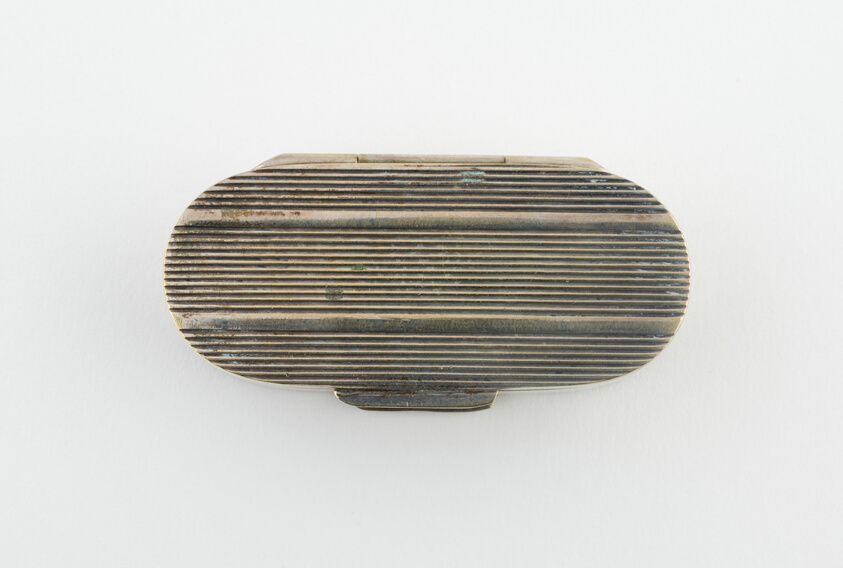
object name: Metalwork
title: Medicine Box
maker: Possibly England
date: c. 1850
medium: Silver, silver gilt, and brass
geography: England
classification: container for personal use; box; european decorative arts; metalwork; silver; decorative object/ornament